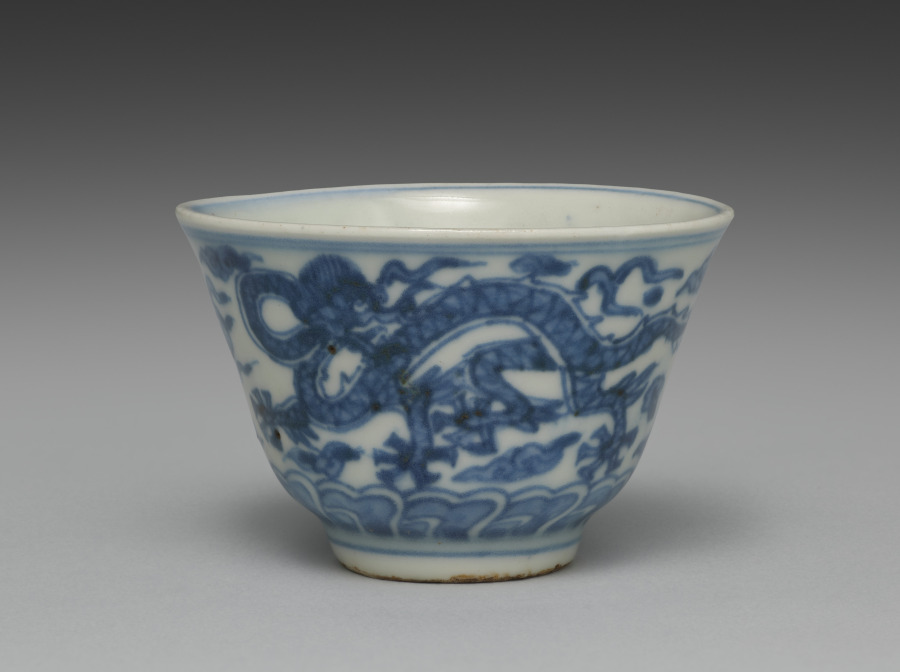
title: Cup from Tea Cups with Dragons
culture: Japan, Edo period (1615–1868)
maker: Seifū Yohei I (Japanese, 1801–1861)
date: 1840s–57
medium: One from a set of five tea cups; porcelain with underglaze blue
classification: Ceramic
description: Seifū Yohei I made both blue and white porcelains after Ming dynasty (1368–1644) Chinese wares fired in the kilns at Jingdezhen for export. He also made colorful stoneware in the style of his teacher, Nin’ami Dōhachi (Takahashi Dōhachi II) (1783–1855).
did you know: A small figure of an elephant serves as the handle for the lid.